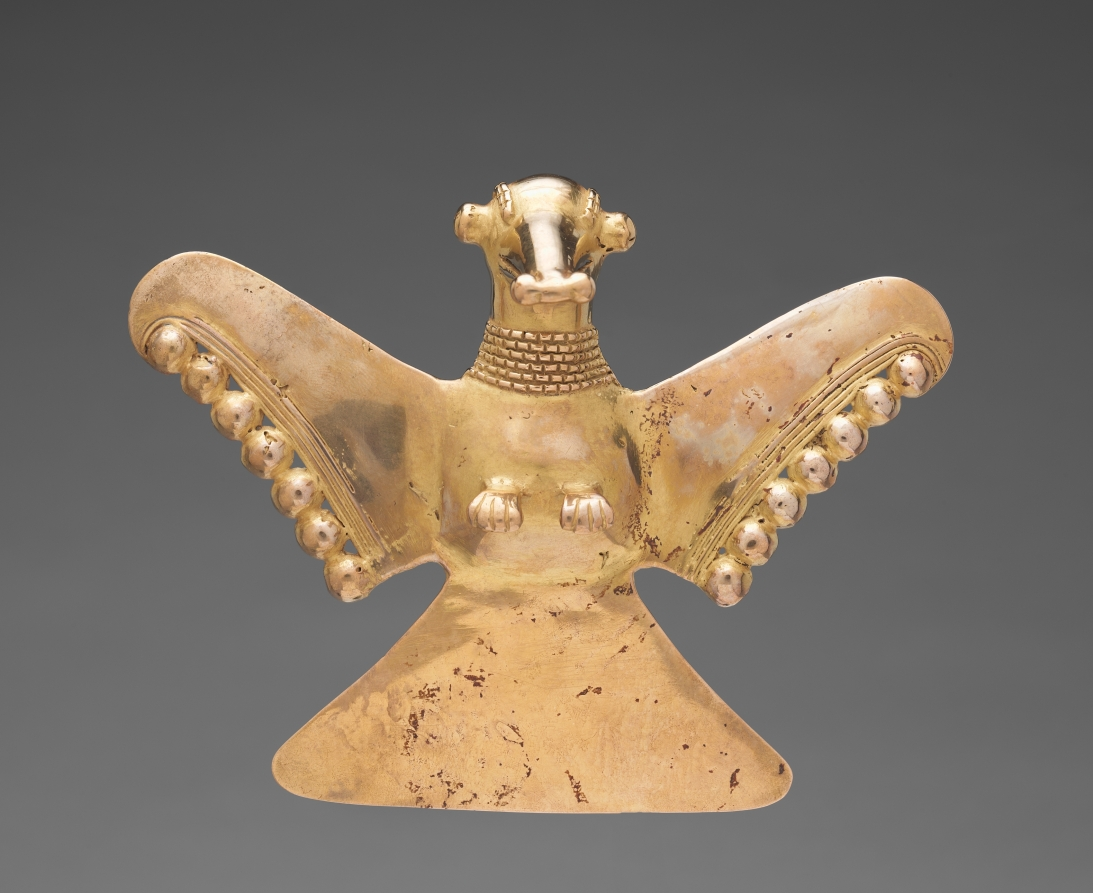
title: Bird Pendant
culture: Panama, Veraguas-Chiriquí style, 11th - 16th century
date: c. 1000–1550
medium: cast gold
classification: Metalwork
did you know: In the Panama-Costa Rica region, gold ornaments were associated with political and religious authority.